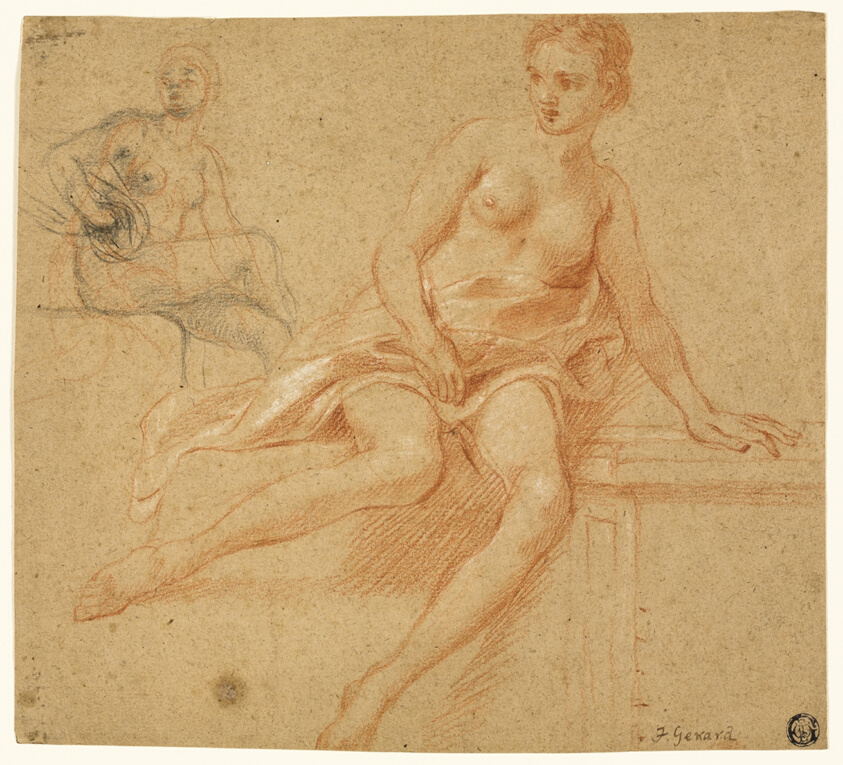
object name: Drawing and Watercolor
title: Two Sketches of Seated Female Nude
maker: Attributed to Baron François Pascal Simon Gérard; French, 1770-1837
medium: Red, black, and white chalk on tan laid paper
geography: France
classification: chalk; drawings (visual works); prints and drawing